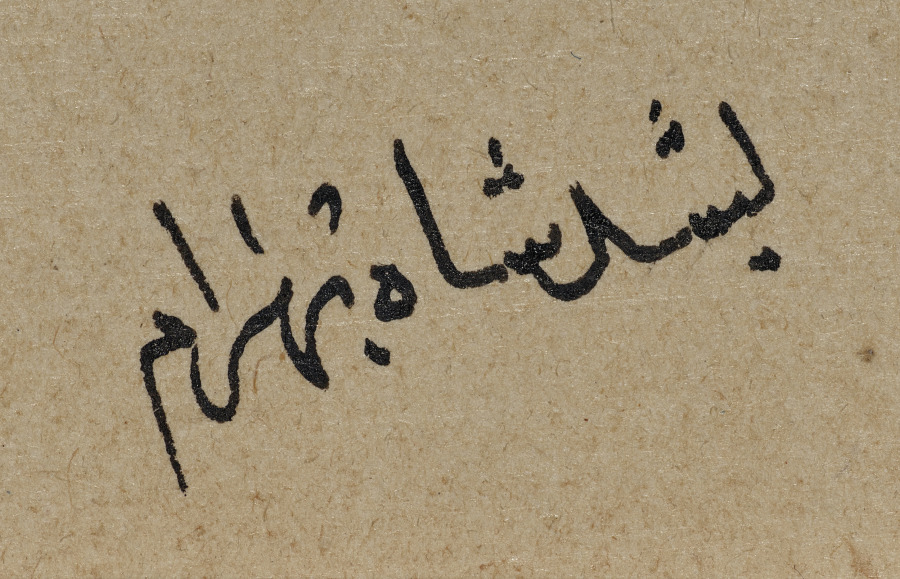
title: Bahram Gur Slays a Dragon (verso), from a Shahnama (Book of Kings) of Firdausi (940–1019 or 1025), known as the Great Mongol Shahnama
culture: Iran, Tabriz, Ilkhanid period (1256-1353)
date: 1330–35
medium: opaque watercolor, ink, and gold on paper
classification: Manuscript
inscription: Script: Naskh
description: In this intense painting, Bahram Gur plunges his sword into the breast of a dragon. A favorite character from Iran's pre-Islamic history, Bahram Gur (reigned 420–38 CE) was a popular ruler of the Sasanian dynasty and a great hunter. He took the name "Gur," meaning onager (a wild ass), because it was his preferred game, although he also excelled at killing dragons. As evidenced by this illustration's rock formations, tree trunk, and dragon, Iranian painting in the Mongol period borrowed numerous stylistic and spatial elements from Chinese models. With the surging landscape and writhing dragon rendered with equal energy, this is a picture of extraordinary unity and concentration.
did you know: The monumental Great Mongol Shahnama was commissioned by a ruler of the Ilkhanid dynasty, which governed the southwestern part of the Mongol Empire.